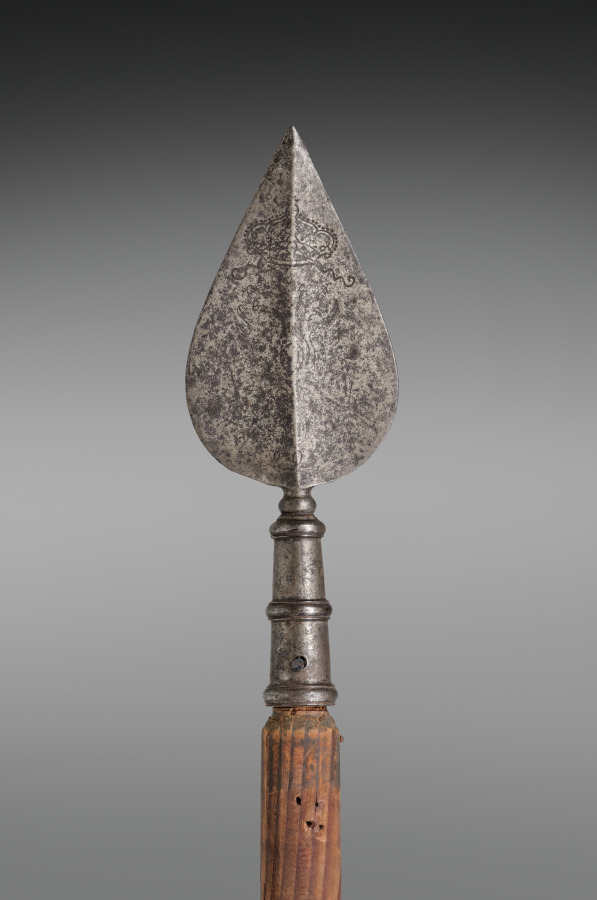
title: Banner with a Quartered Royal Arms of Spain and the Madonna and Child (pole)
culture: Spain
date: 1500s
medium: wood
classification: Arms and Armor